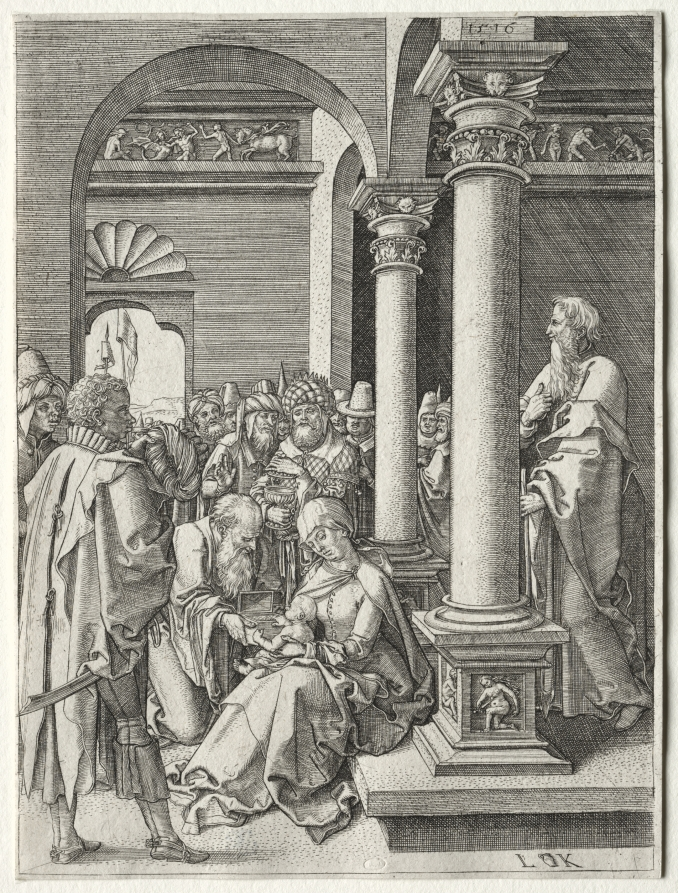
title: L'Adoration des Rois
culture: Germany, Nuremberg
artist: Ludwig Krug (German, 1490–1532)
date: 1516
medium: engraving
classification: Print